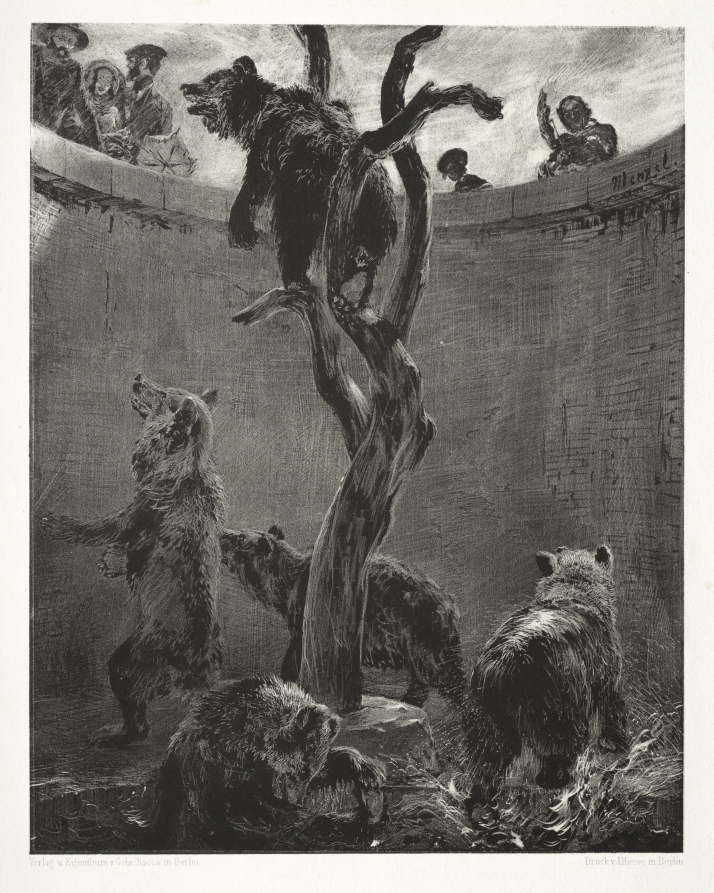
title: Essay on Stone with Brush and Scraper: The Bear Pit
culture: Germany, 19th century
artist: Adolph von Menzel (German, 1815–1905)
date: 1851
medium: lithograph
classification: Print